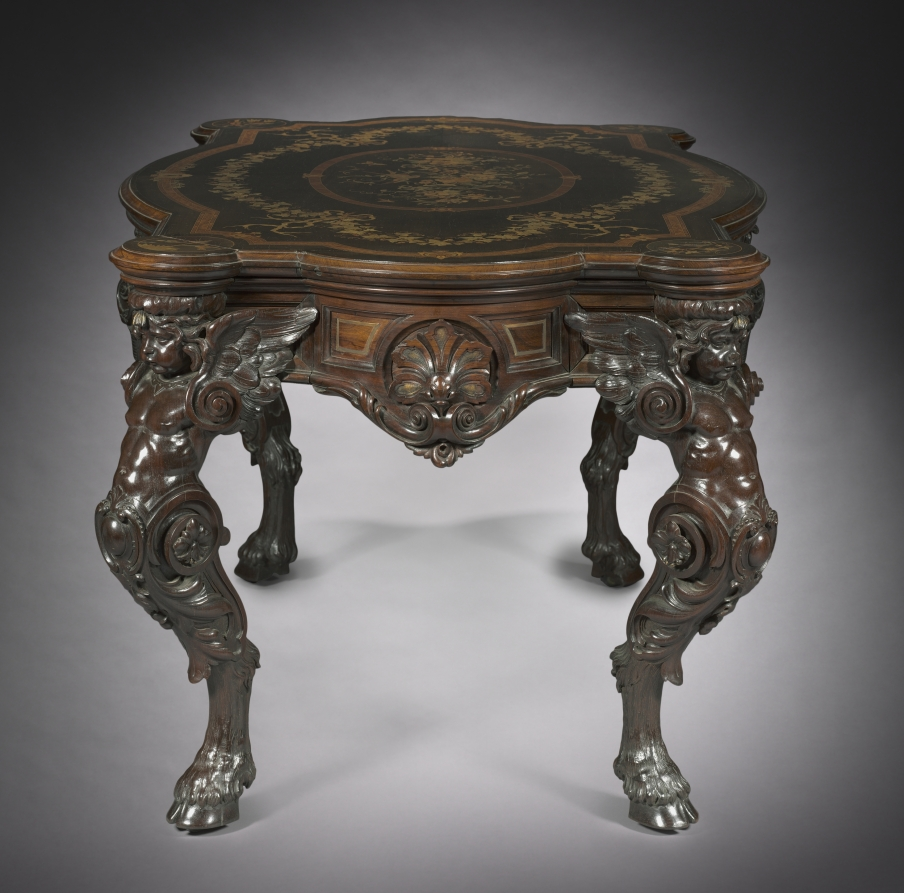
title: Center Table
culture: America, New York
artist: Gustave Herter Firm (American)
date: c.1860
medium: rosewood with marquetry of various woods, brass inlay, and gilding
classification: Furniture and woodwork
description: Gustave Herter was born in Germany and came to America about 1848. This table can be identified as his work because of its close resemblance to a table supplied by Herter about 1860 to the Victoria Mansion in Portland, Maine. The pictorial marquetry of the top may have been imported from France and incorporated into this table, probably made in New York.